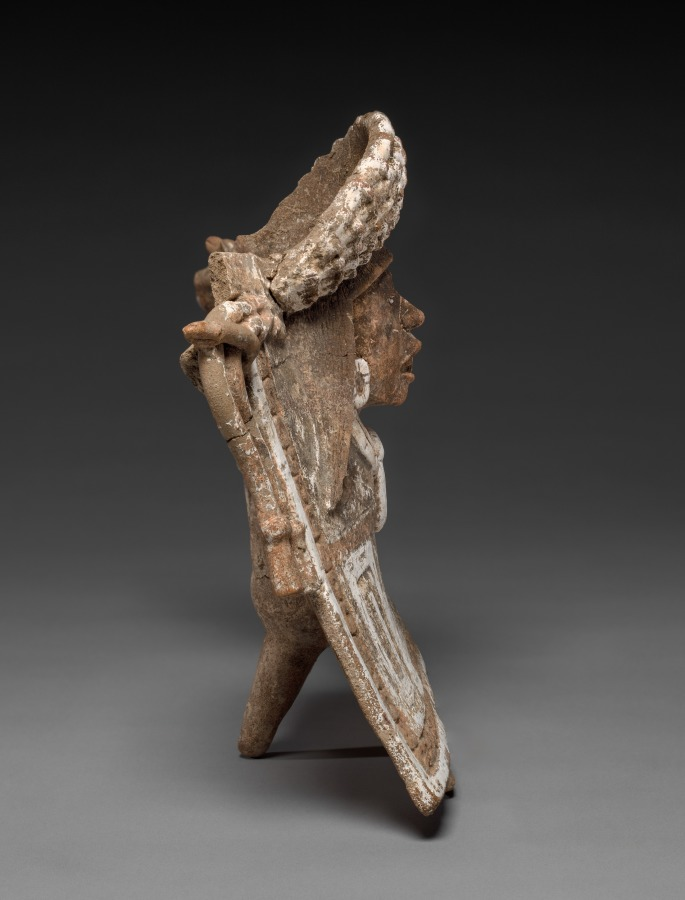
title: Standing Female Figure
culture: Mesoamerica, Veracruz, Nopiloa style?, 7th-10th century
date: 600–1000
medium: ceramic, pigment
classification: Sculpture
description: Ancient Veracruz artists used ceramic to create figural sculptures in a range of sizes, styles, and types. This beautiful, finely wrought female figure is an exceptional example. Although her identity is unknown, her adornments signal high status: ear ornaments, a large necklace, an elaborate dress that drapes over her outstretched arms, and perhaps even her front teeth, filed into a T shape, may have symbolic importance. The unfinished back, with a tripod support, suggests that the figure was meant to be seen from the front.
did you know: This lovely female’s body is a flat plaque supported by a tripod at the rear.